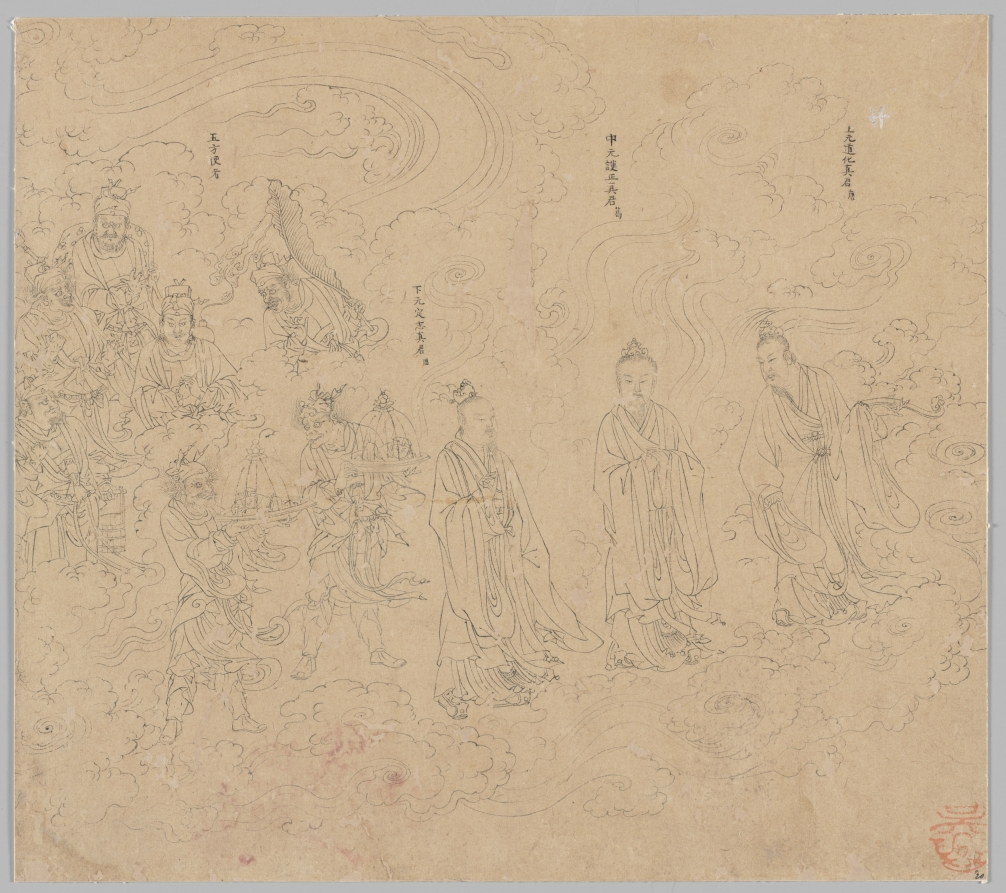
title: Album of Daoist and Buddhist Themes: Procession of Daoist Deities: Leaf 20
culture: China, Southern Song dynasty (1127-1279)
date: 1200s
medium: Album, ink on paper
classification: Painting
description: This section of the Daoist pantheon portrays the three True Lords 真君: Tang Hong 唐宏, Ge Yong 真君, and Zhou Bin 周斌, who served as censors during their mortal years. Their loyal attendants help subjugate the figures at the left and are also compassionate to the common people.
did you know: Two attendants offer the True Lords covered plates, each containing a miniature reclining figure.